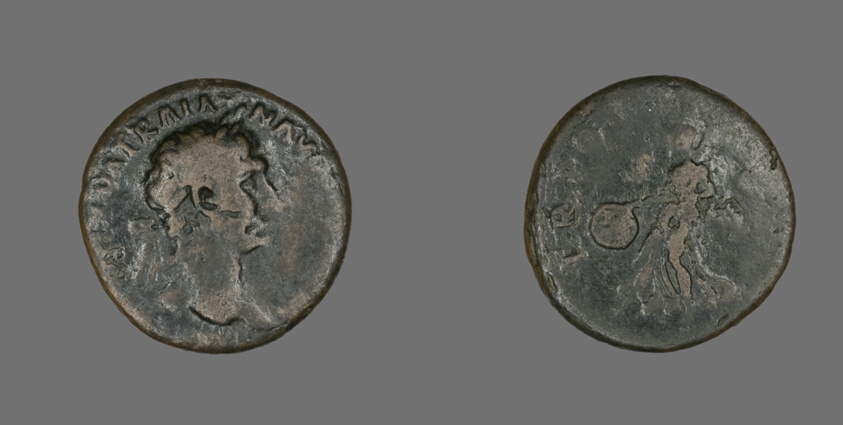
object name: Coin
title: As (Coin) Portraying Emperor Trajan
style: roman (ancient, style or period)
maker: Roman, minted in Rome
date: 98-100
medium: Bronze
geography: Roman Empire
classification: coin; ancient art